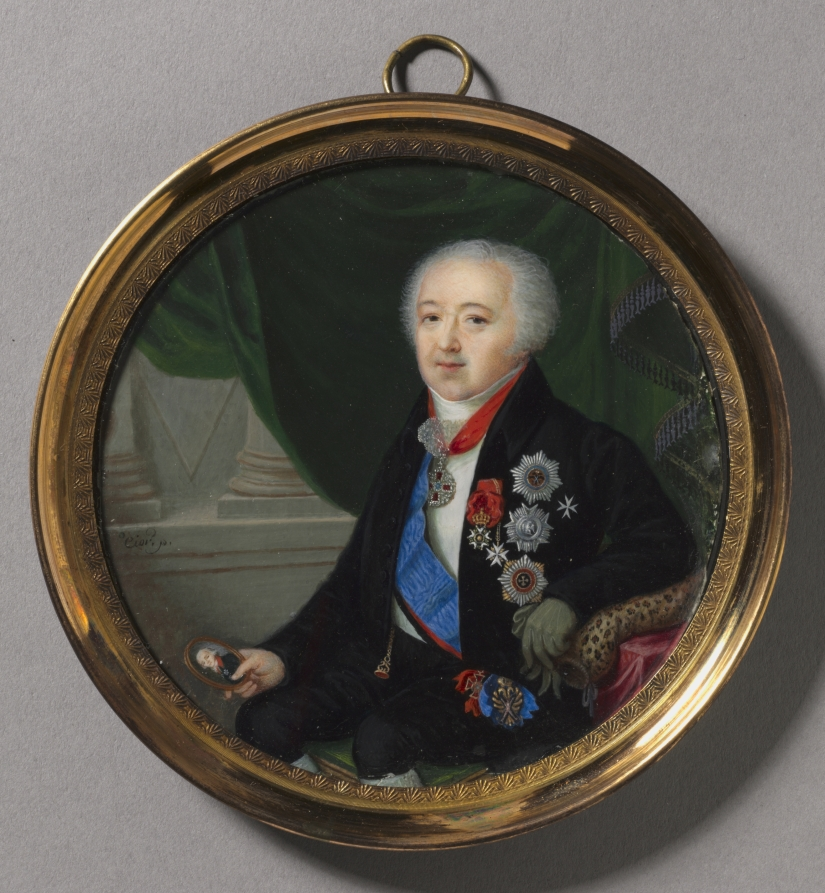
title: Portrait of Prince Alexander Bezborodko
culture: France, 18th century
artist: Pierre-Charles Cior (French, 1769–1840)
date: mid- to late 1700s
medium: watercolor on ivory in a 19th-century gilt metal frame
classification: Portrait Miniature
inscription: signed left: Cior.p.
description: This portrait of Alexander Bezborodko, chancellor of Russia from 1747 to 1799, was painted by Pierre-Charles Cior in the final years of the 18th century. Previously a foreign minister for Catherine the Great, the prince became grand chancellor of the Russian empire upon the 1797 accession to the throne of Catherine's son Paul I. In this position, Bezborodko reformed the post office, regulated the banking systems, and constructed roads. Here he is shown dressed in a blue uniform with the blue sash of the Order of Saint Andrew over the red and black sash of the Order of Saint Vladimir. Pinned over his left breast are stars and badges of the Order of Saint Andrew as well as the Maltese cross. Around his neck is the decoration of the Order of Saint Alexander Nevsky, which is encrusted with diamonds. Bezborodko holds a miniature of Paul I in his right hand while resting his left arm on a leopard pillow. He poses in front of a lavish green curtain and classical colonnade. Trained under the Spanish miniaturist Juan Bauzil, Cior became the official miniaturist of the king of Spain and a court painter in Russia, likely creating this portrait during his extended stay in Saint Petersburg. His depiction of Bezborodko is unusual; when compared to the rest of the prince's body, his legs appear diminutive, as if the artist failed to leave enough room for them when painting. This miniature dates from early in Cior's career, and Bezborodko's small lower body may be a result of the immature artist experimenting with composition. The tiny portrait of Paul I that Bezborodko holds in his right hand relates to a late 18th-century oil painting of the king attributed to A. F. Mitrokhin. Cior's inclusion of the miniature of Paul I demonstrates how miniatures were handled by their owners and how they could be used in portraits to lend credibility or show allegiance.